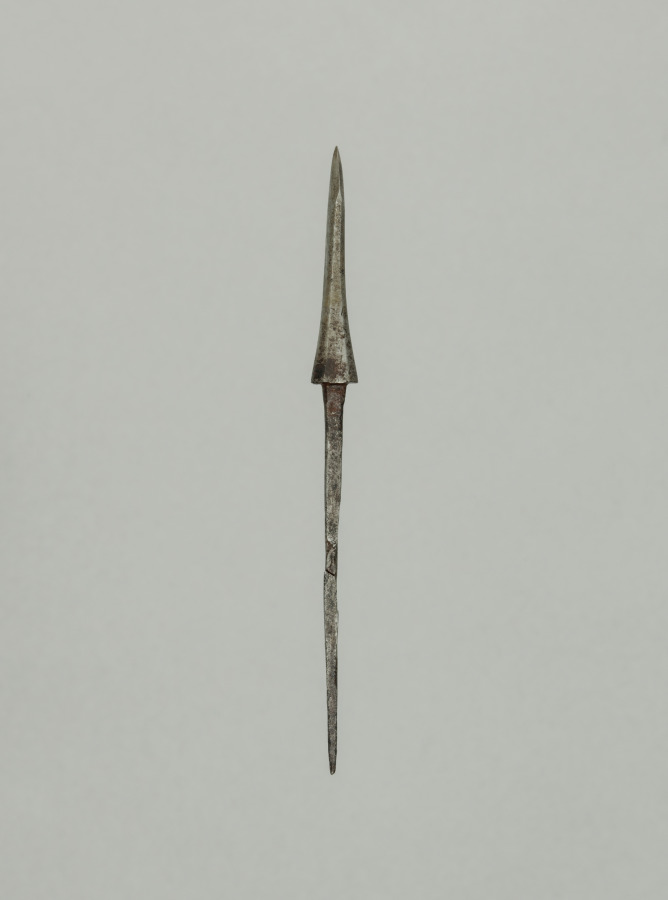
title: Arrow Point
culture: Japan, Edo period (1615–1868)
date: 1700s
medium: steel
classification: Arms and Armor